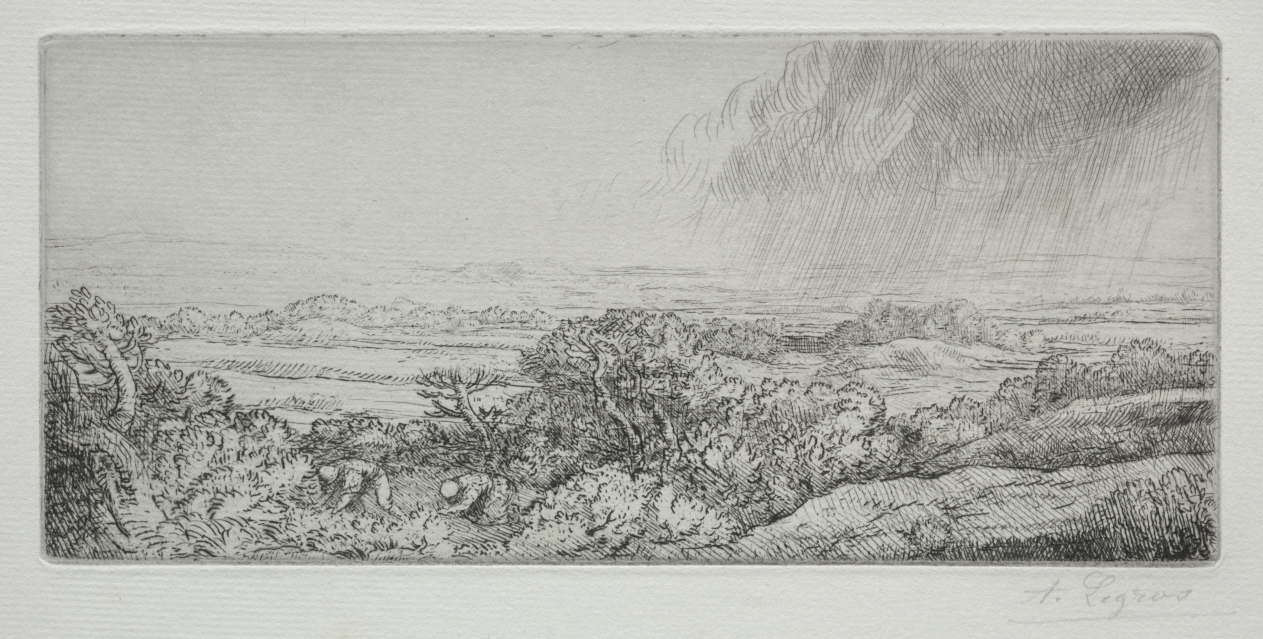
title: Les Ramasseurs des Champignons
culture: France, 19th-20th century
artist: Alphonse Legros (French, 1837–1911)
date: c. 1857–1911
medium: etching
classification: Print